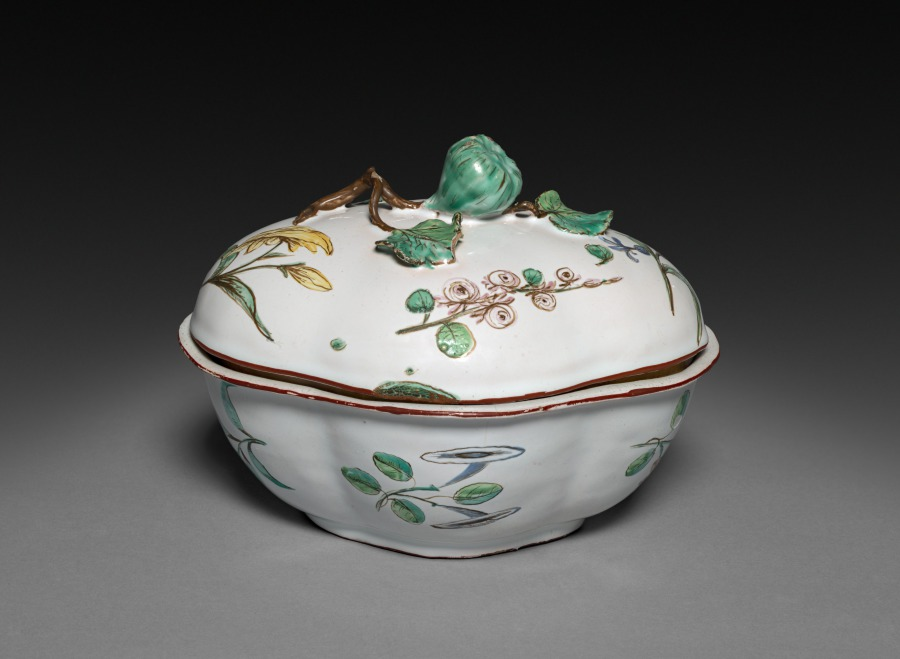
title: Sugar Basin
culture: France, 18th century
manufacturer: Sceaux Factory (French, active 1748–66)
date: c. 1750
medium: faience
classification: Ceramic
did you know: In medieval Italian churches, painted altarpieces served as a focal point for worshippers during the rituals of faith. The figures of Jesus, Mary, and eight saints are framed by a golden background that would have glistened in the flickering candlelight of the church.